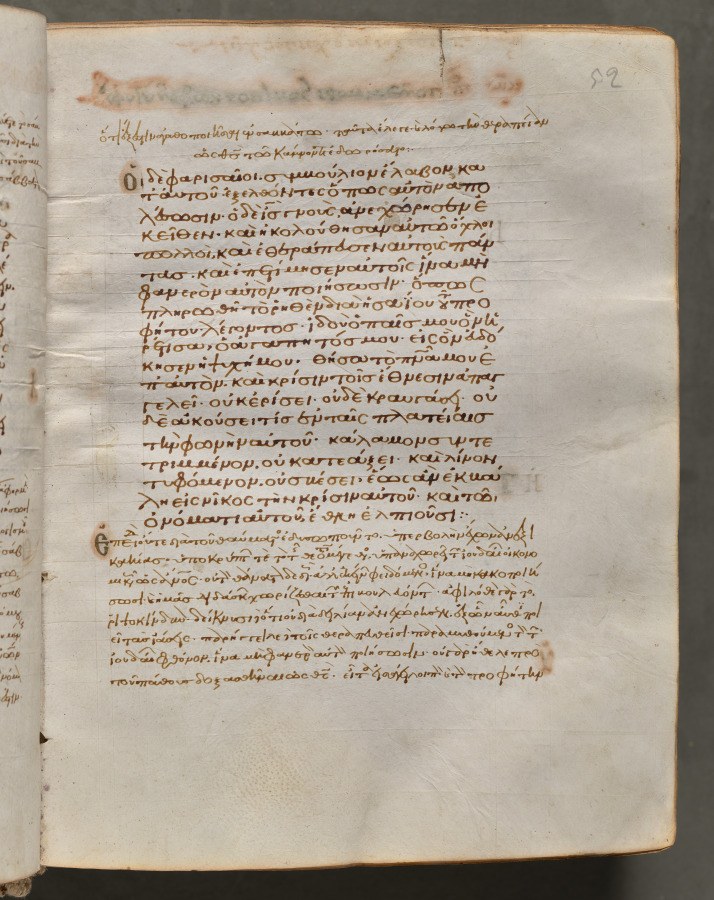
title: Text, folio 52 (recto), from a Gospel Book with Commentaries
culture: Byzantium, Constantinople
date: c. 1000–1100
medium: ink, tempera, and gold on vellum; leather binding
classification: Bound Volume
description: Each of the four gospels in this book opens on a page with brilliantly illuminated borders depicting the author of the text as well as birds-principally peacocks, symbols of the immortality of the soul-and fountains, representing the fountain of life and the salvation of the soul. This volume consists of 428 leaves with texts in Greek. Its level of sophistication suggests that it was probably written and decorated in a monastery in Constantinople.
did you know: Gospel Books were carried in procession through Byzantine churches.